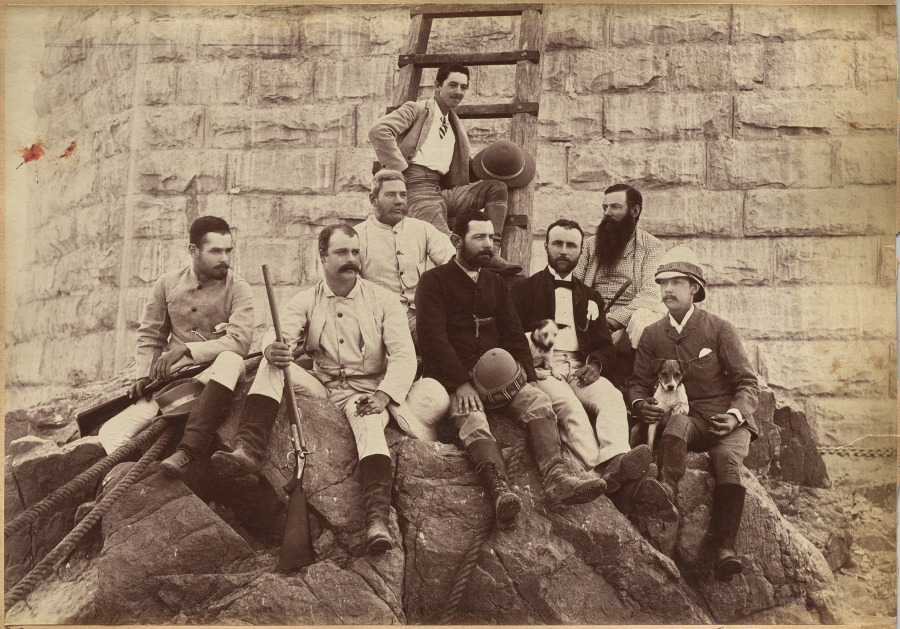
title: Staff of Messrs. Glover & Co., Sindh Bridge (verso)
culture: India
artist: Raja Deen Dayal (Indian, 1844–1905)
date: c. 1882–87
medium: albumen print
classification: Photograph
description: These photographs are part of an album, now disassembled, of around 105 photographs taken in India between 1885 and summer 1887 that provide glimpses into the lives of the British colonial elite and royal and upper-class Indians. The museum holds another group of 37 pictures from this album (2016.266), which was probably commissioned by a British civil servant visiting or working in India around 1888 as a personal souvenir of his experiences there.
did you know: Raja Deen Dayal is regarded now, and was considered during his lifetime, to be India’s most important 19th-century photographer.